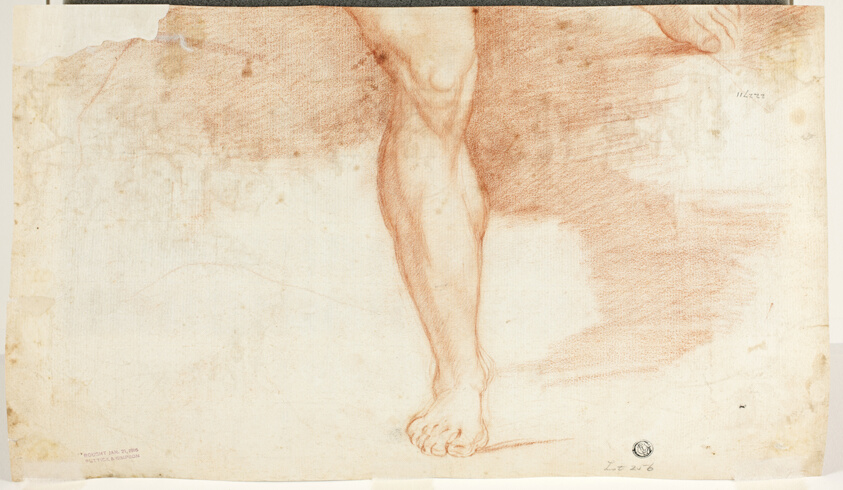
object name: Drawing and Watercolor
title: Calvary (recto); Sketch of Lower Part of Right Leg (verso)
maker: Unknown Artist; Italian, 17th century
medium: Pen and brown ink, with brush and brown wash, and traces of black chalk (recto), and red chalk (verso), on ivory laid paper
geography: Italy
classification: drawings (visual works); prints and drawing; chalk; paper; pen and ink drawings